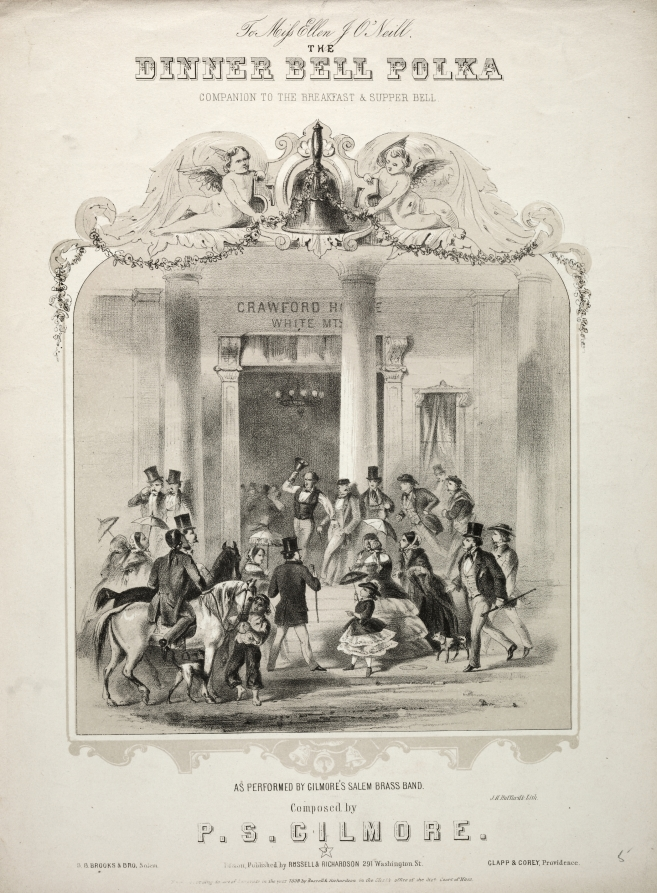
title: The Dinner Bell Polka - Sheet Music Cover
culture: America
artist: Winslow Homer (American, 1836–1910)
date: c. 1858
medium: lithograph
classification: Print